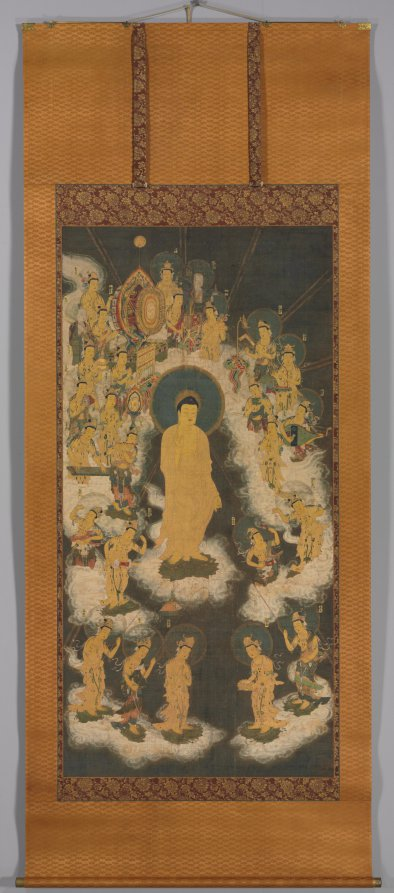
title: Welcoming Descent of Amida (Amida Raigō)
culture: Japan, Kamakura period (1185–1333)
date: 1300–1333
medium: hanging scroll; ink, color and gold on silk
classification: Painting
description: In the Pure Land school of Buddhism, Amida Buddha is the focus of worship. Pictured here is the raigō, or the moment when Amida descends with his retinue to welcome a dying person into his Pure Land, called the Western Paradise. Once there, a person can concentrate on becoming enlightened. Images like this one could be placed before a person on their deathbed to help them stay faithful and motivated to attain birth in the Pure Land.